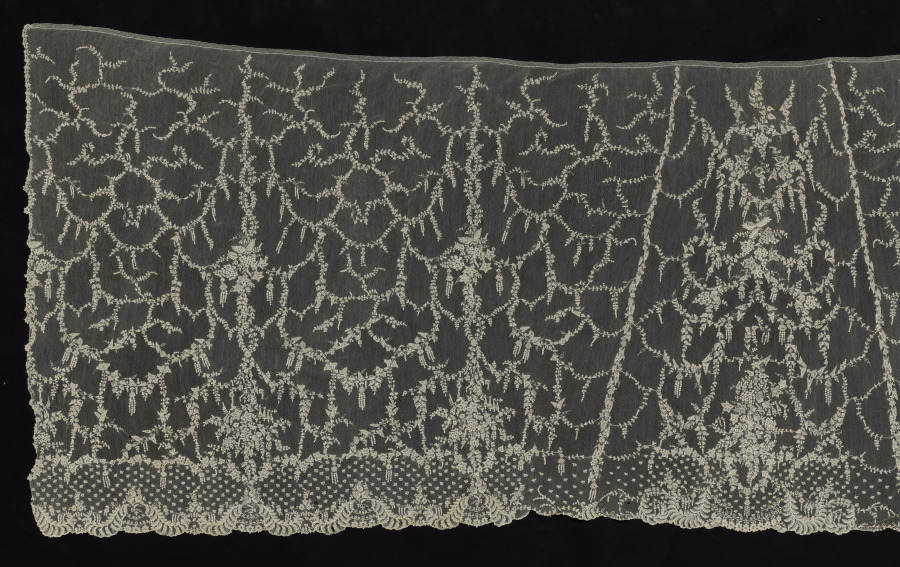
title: Lace Flounce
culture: France, Alençon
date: 1840–60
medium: Needle lace (Point d'Alençon)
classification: Lace